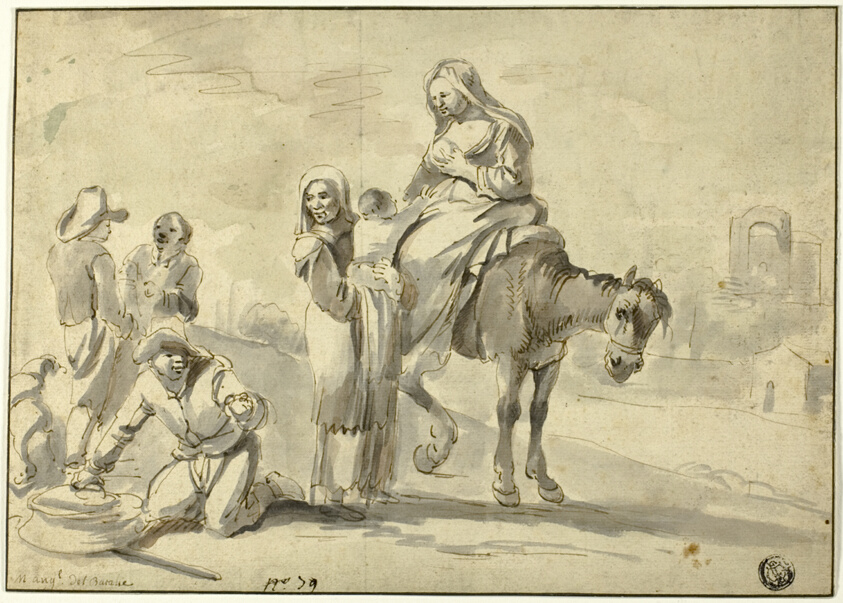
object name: Drawing and Watercolor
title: Travelers Resting for Nourishment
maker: possibly Michelangelo Cerquozzi; Italian, 1602-1660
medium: Pen and brown ink with brush and gray, blue, and brown wash, on ivory laid paper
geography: Italy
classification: pen and ink drawings; drawings (visual works); prints and drawing